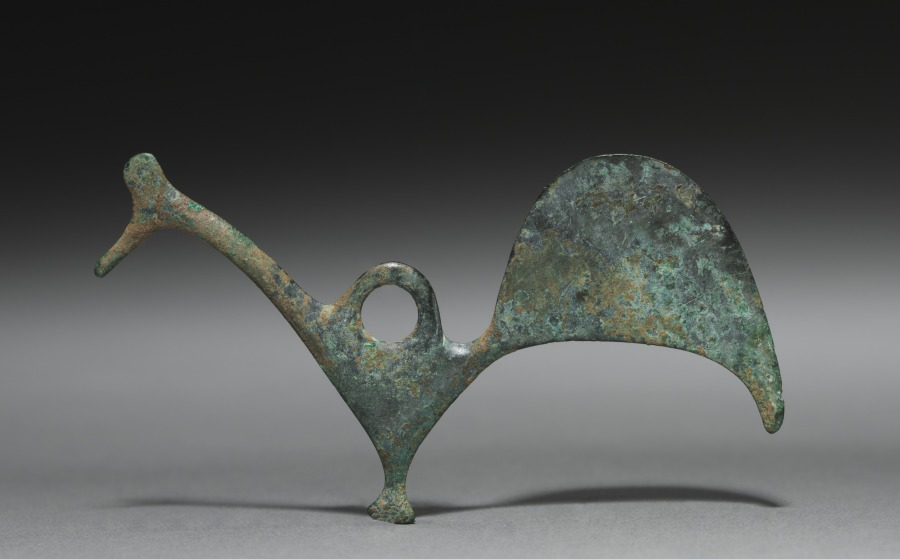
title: Pendant of a Bird (Rooster?)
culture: Northern Greece, Macedonian, Geometric period (900-700 BCE)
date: 700s–600s BCE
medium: bronze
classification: Jewelry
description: Although quite schematic, the subject of this pendant is easily recognizable as a bird, likely a rooster. Cleverly designed to hang evenly from its central suspension loop, it comprises three main parts: long neck terminating in a head with a pointy beak and small crest; triangular body with stylized feet; and broadly arched tail feathers.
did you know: The green patina of this bronze bird pendant is a result of oxidation.